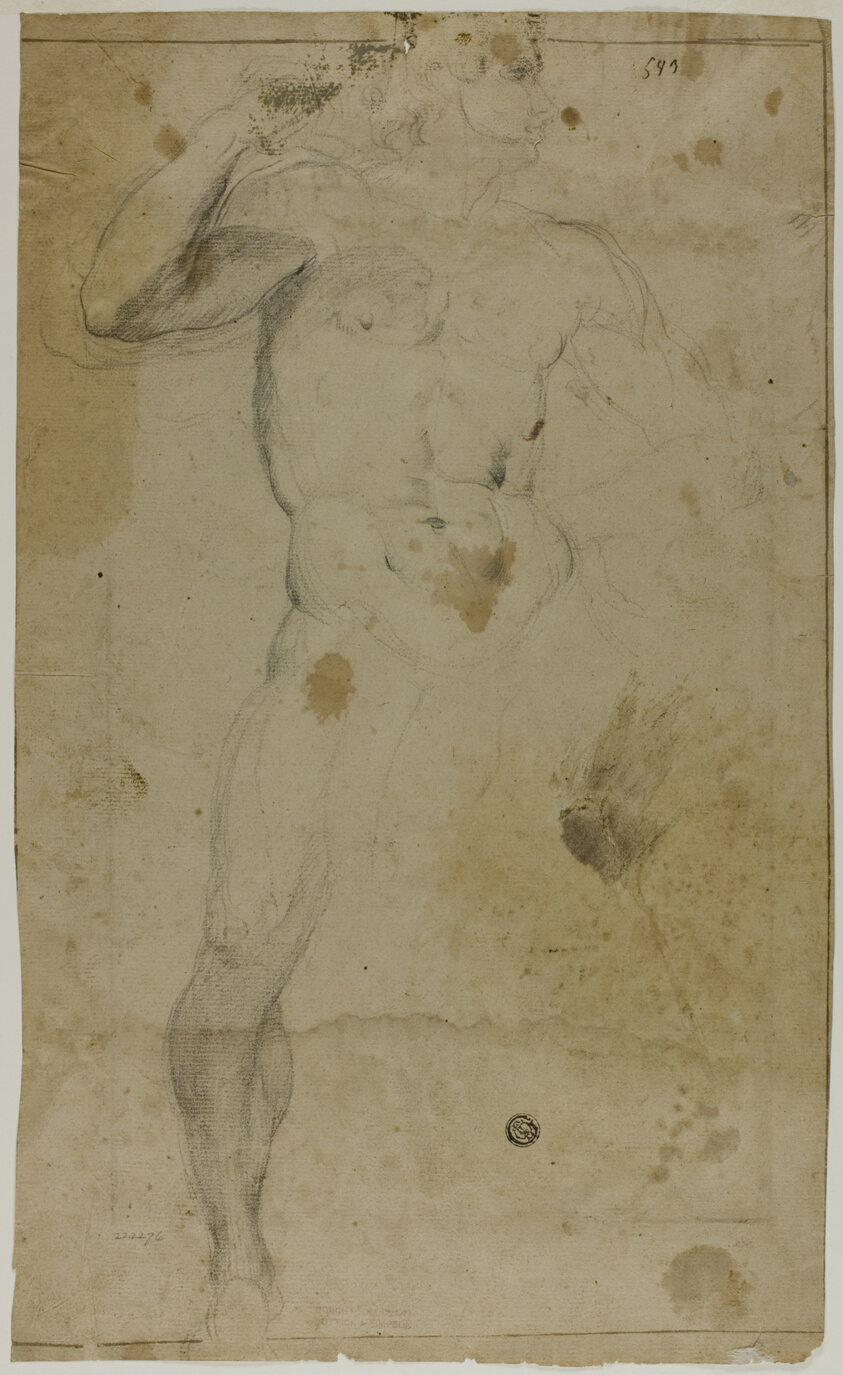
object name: Drawing and Watercolor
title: Standing Male Nude (recto); Two Half Length Male Figures, One with Raised Arm, the Other Praying (verso)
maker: Probably Domenico Fiasella (Italian, 1589-1669); or possibly Lodovico Carracci (Italian, 1555-1619)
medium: Black chalk, with traces of white chalk (recto and verso), on tan laid paper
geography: Italy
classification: drawings (visual works); prints and drawing